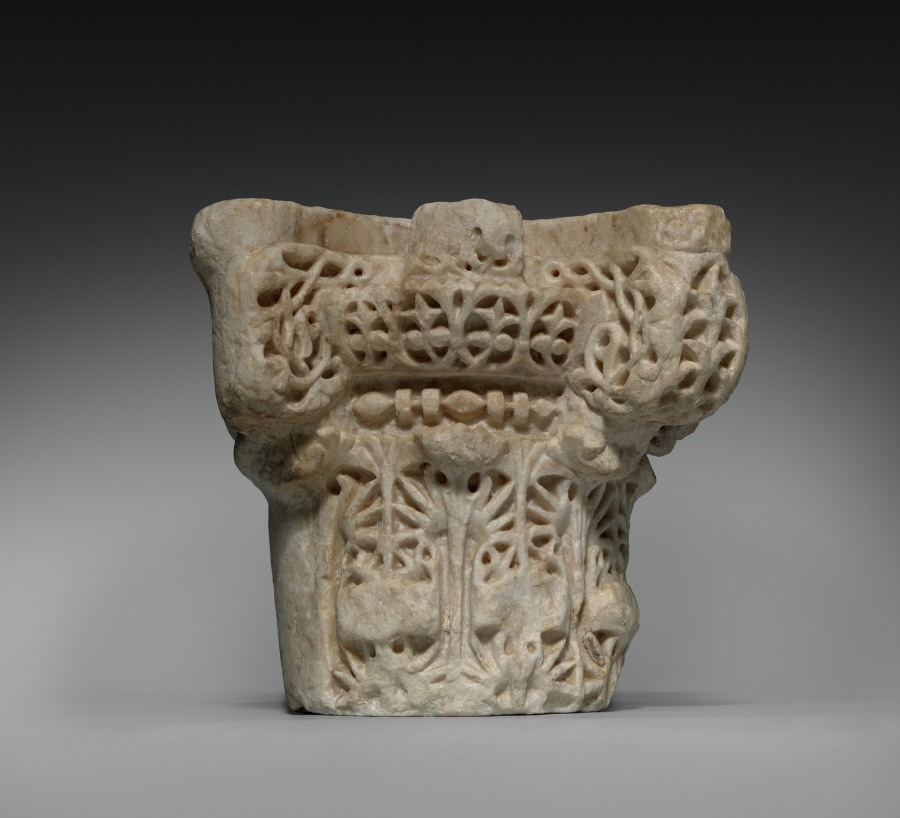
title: Column Capital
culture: Spain, Cordoba, Madinat al-Zahra, Spanish Umayyad period (756–1031)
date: c. 960–76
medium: Marble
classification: Sculpture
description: This capital comes from the palatial city of Madinat al-Zahra near Cordoba (Spain) which was begun by caliph Abd al-Rahman III (r. 912–61) around 936. Large parts of the Iberian Peninsula were then under Islamic rule and experienced a cultural flowering. The city, destroyed already in 1010, was the most magnificent palace complex in Europe at the time.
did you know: In the mid-1800s the ruins of Madinat al-Zahra were rediscovered and became the source of great fascination as people imagined a palace like that in the stories of One Thousand and One Nights.